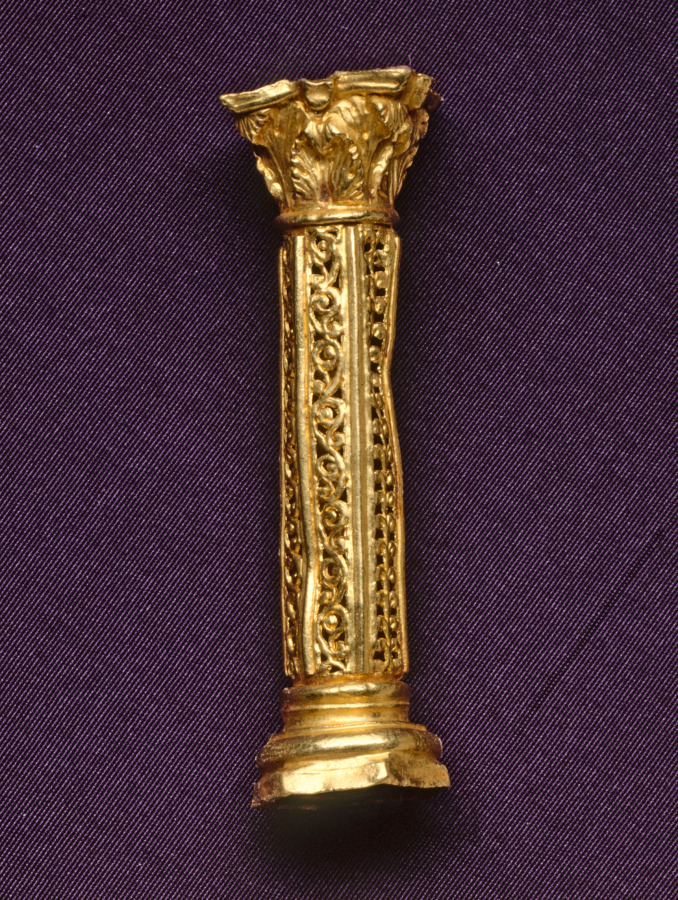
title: Spacer in the Form of a Corinthian Column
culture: Byzantium, Late Roman, Eastern Mediterranean, (probably Sirium or Nicomedia), Byzantine period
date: 324–26 CE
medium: gold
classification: Jewelry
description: Mounted at the center of this octagonal pendant is a rare coin issued by Constantine the Great, the Roman Empire’s first Christian emperor. Constantine’s portrait appears on the coin’s front, those of two of his sons on the back. Constantine’s image is surrounded by male and female busts, some of which are mythological figures. The pendant once formed the centerpiece of a sumptuous gold necklace, likely a gift for a high-ranking court official or member of the imperial family.